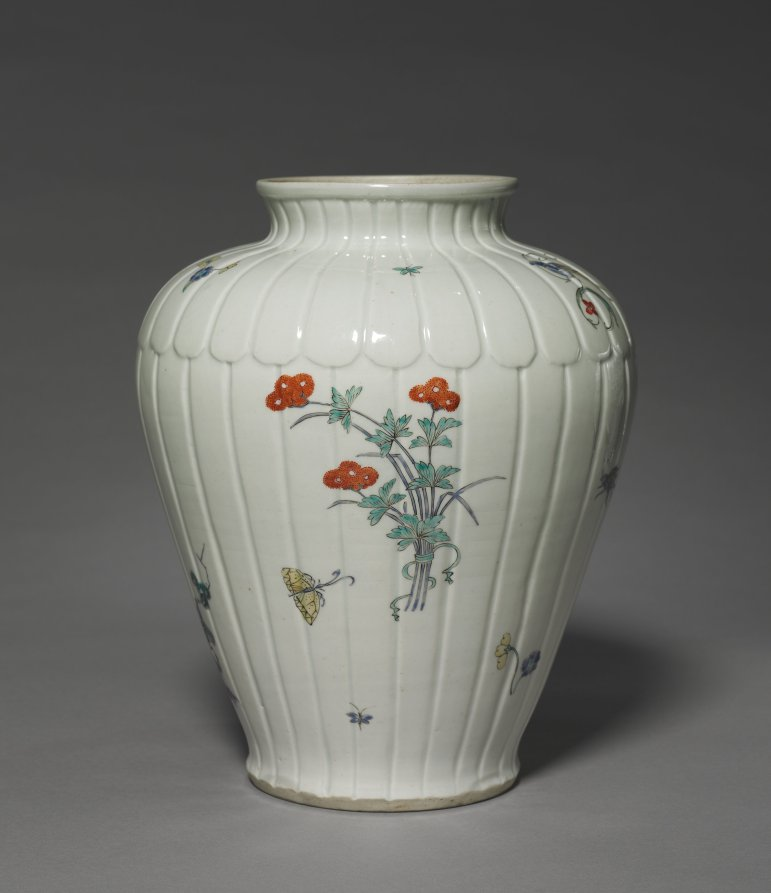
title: Vase with Floral, Insect, Bird, and Chinese Designs: Kakiemon Type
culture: Japan, Edo period (1615–1868)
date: late 1600s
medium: porcelain with overglaze enamel, gilding and carved decoration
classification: Ceramic